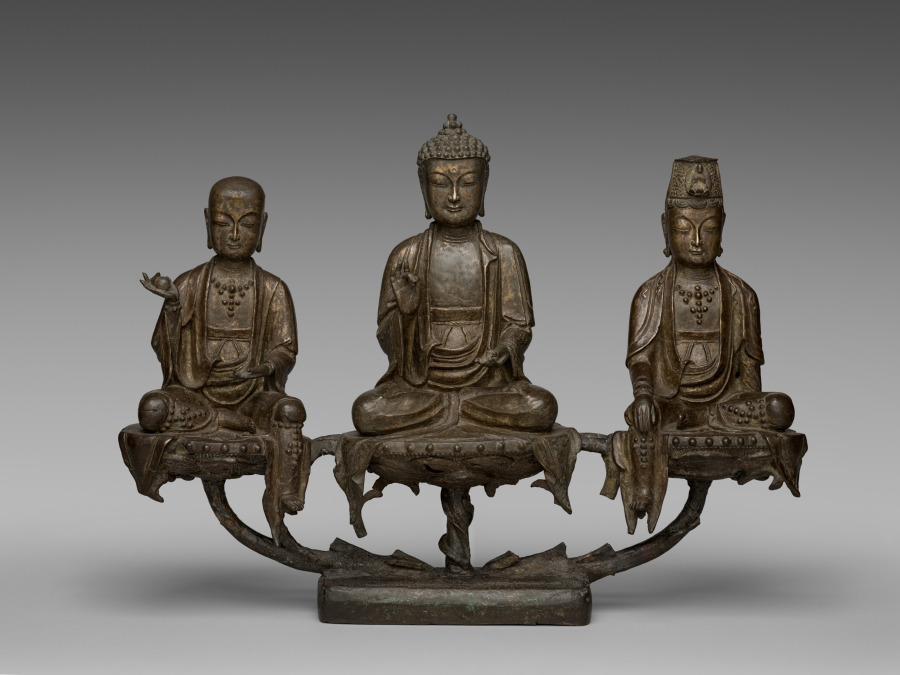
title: Amitabha Triad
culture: Korea, Joseon dynasty (1392–1910)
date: 1400s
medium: bronze with traces of gilding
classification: Sculpture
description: This bronze triad depicts Amitabha, the Buddha of Western Paradise, at the center, flanked by two bodhisattvas: Ksitigarbha on his left and Avalokiteśvara on his right. Ksitigarbha is believed to rescue those tormented beings from purgatory, while Avalokiteśvara offers relief to those suffering in the mortal realm. An exceptionally rare statue from the 1400s, this piece entered the CMA’s collection in 1918. It was discovered in Korea in 1916 by Langdon Warner (1881–1955), who was serving as the CMA’s field agent. In a letter dated December 4, 1916, Warner expressed not only his excitement upon finding the triad in a local pawn shop but also his satisfaction at purchasing it at a significantly reduced price.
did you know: The small scale suggests that this rare bronze triad might have been displayed in a personal shrine rather than a large worship hall.